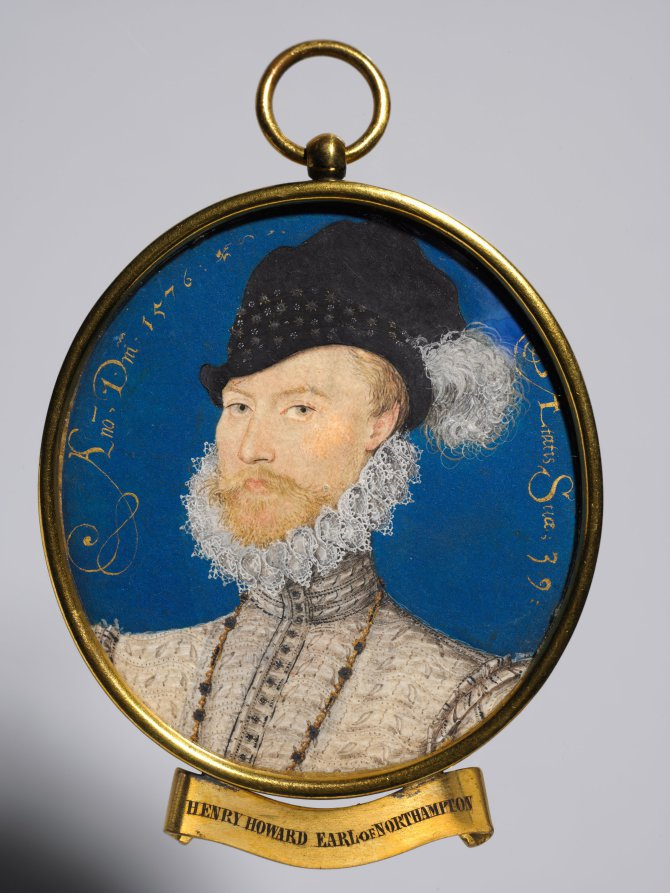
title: Portrait of Charles Howard, 2nd Baron Howard of Effingham, later 1st Earl of Nottingham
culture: England, 16th century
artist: Nicholas Hilliard (English, c. 1547–1619)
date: 1576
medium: watercolor on vellum in a gilt metal frame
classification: Portrait Miniature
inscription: inscribed from left: Ano, Dm. 1576: / AEtatis Suae; 39.